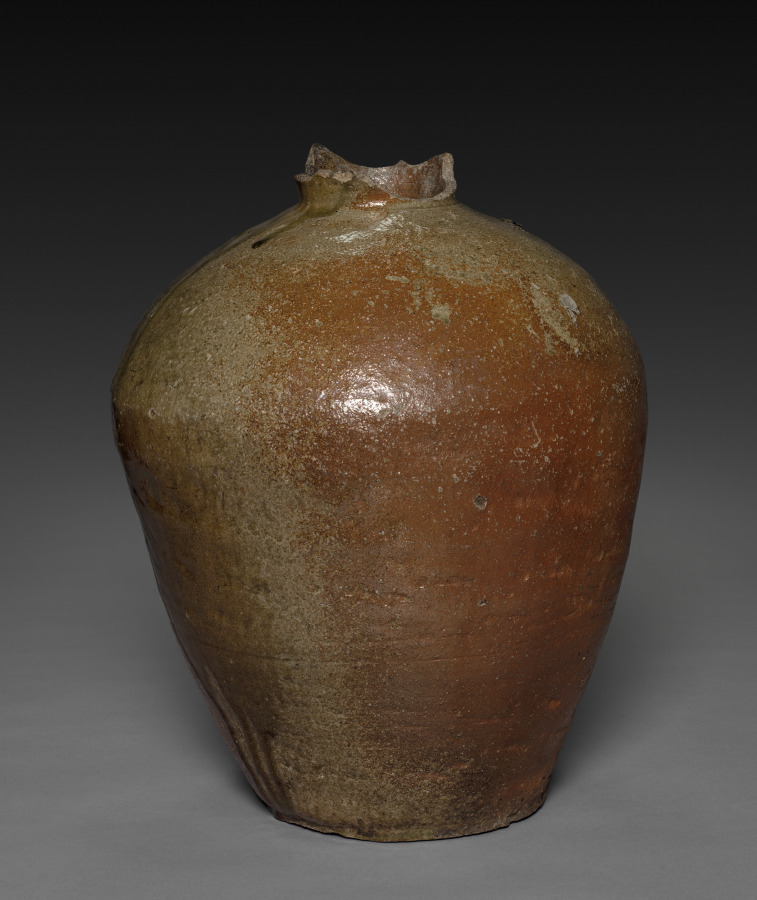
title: Storage Jar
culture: Japan, Muromachi period (1392–1573)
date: 1400s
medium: Stoneware with natural ash glaze (Tamba ware)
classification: Ceramic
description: For centuries the Tokai region surrounding present-day Nagoya has been an especially fertile ceramic production center. One site was a group of kilns located west of Kyoto, in Tamba province. Nestled in a farming valley in the mountains behind the modern port of Kobe, Tamba required a regular supply of storage vessels and sturdy containers for distributing grain. This jar was formed in three sections, each fluted to the next and turned on a potter's wheel to scrape off excess material. Both interior and exterior walls were smoothed with a wooden or bamboo tool, leaving markings on the lower body and shoulder. The neck opening is small and wheel-turned, as is the neck, which bears fine lines and a matte-glazed surface. The lustrous green glaze that highlights the jar once trailed from the vessel's lip and clung to the entire shoulder wall, mingling with the warm, orange-brown tone of the clay body underneath. The surface is crackled with craters where stone material within the clay migrated up to the surface during firing and then fell away. The result is a particularly rich and varied "landscape," typical of Tamba ware's subdued, earthy vitality.